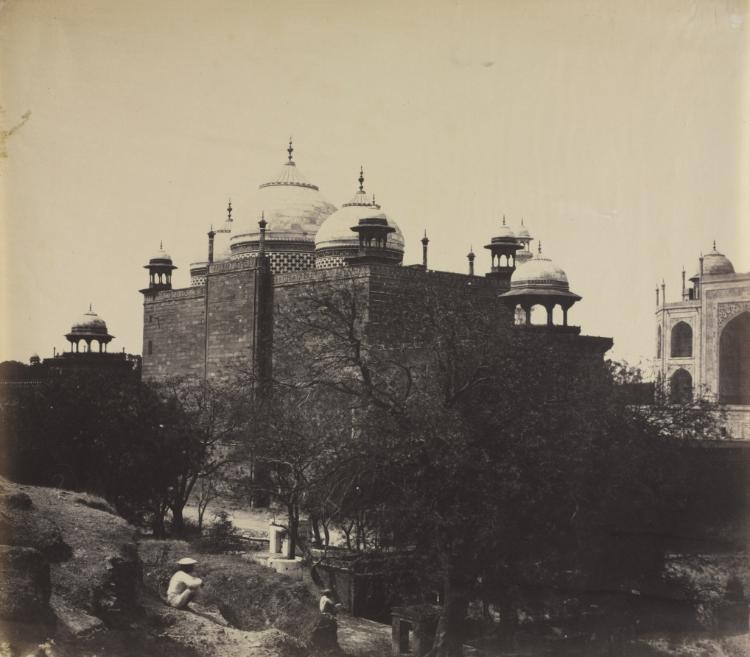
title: Taj Mahal, Back View of the Rest-House, with Figure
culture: England, 19th century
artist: Dr. John Murray (Scottish, 1809–1898)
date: c. 1858–1862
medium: albumen print from wax paper negative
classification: Photograph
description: Although Dr. John Murray enjoyed a distinguished medical career as a surgeon, administrator, and leader in the fight against cholera, he is now best known for his superb paper negative photographs of India. Having lived near the Taj Mahal in the city of Agra for 20 years, Dr. Murray took great interest in the monument, photographing it from numerous perspectives and under varying light conditions. In this print, he chose an elevated viewpoint to compose an intriguing rendering of the Rest-House. The paper negative was waxed before sensitizing, improving its translucency and allowing the photographer to render his architectural subject matter in broad areas of light and dark, emphasizing the building's bold geometric forms. The surrounding, picturesque landscape adds both visual interest and complexity to the composition. Seated figures in the foreground provide an indication of scale and the sense of wonder that might be experienced in the presence of this vast monument.